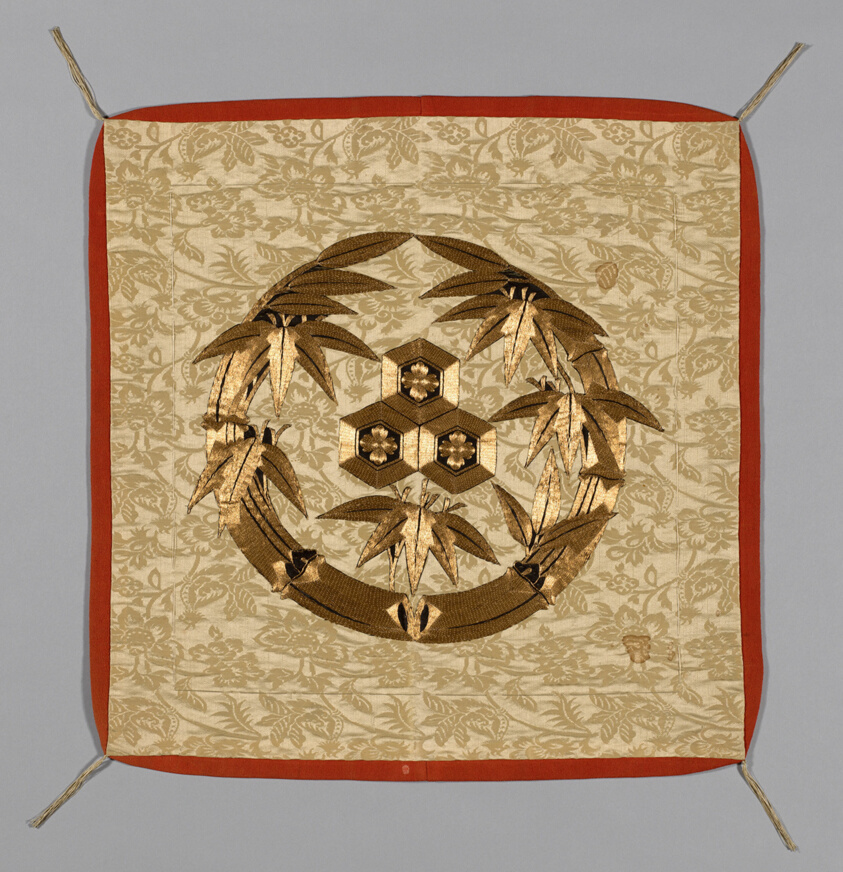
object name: Textile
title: Fukusa (Gift Cover)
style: late edo, edo (japanese period), Japanism, East Asian, asian, meiji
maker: Japan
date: Appliqued fabric: Edo period (1615–1868), late 18th century Mounting fabric: Meiji period (1868–1912), 1868/83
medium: Patterned side: silk, warp-float faced 7:1 satin weave self-pattered by areas of weft-float faced 1:3 'Z' twill interlacings; appliquéd with silk and gold-leaf-over- lacquered-paper-strip wrapped silk in surface satin stitches; laid work and couching; lined with silk, plain weave with creped wefts (chirimen) (possibly dyed with safflower (beni); interlined with cotton, plain weave; sewn with padded lining extending beyond front at center on all four sides (Yatsuzuma); silk, running "controlling" stitches along all edges; silk, knotted, cut fringe tassels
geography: Japan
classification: textile; needlework (visual works); weaving